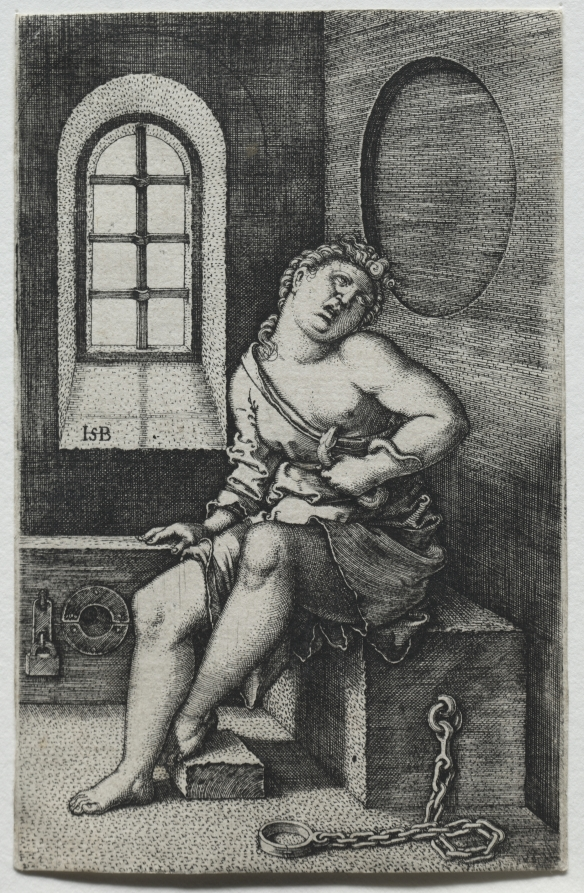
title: Cleopatra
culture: Germany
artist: Hans Sebald Beham (German, 1500–1550)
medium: engraving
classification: Print